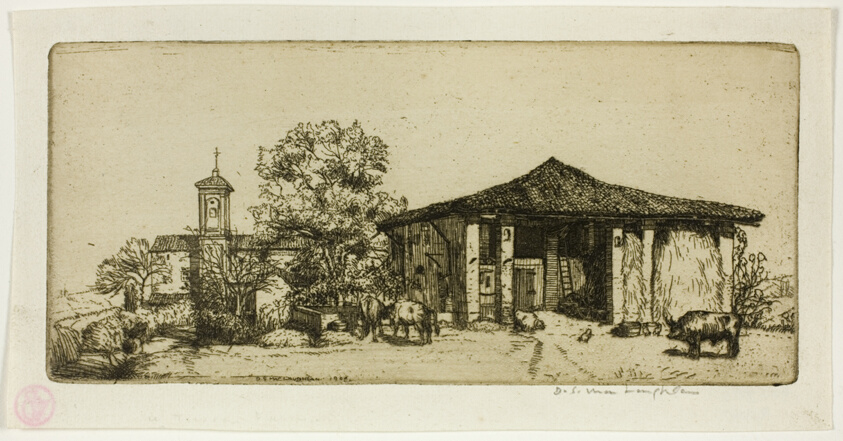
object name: Print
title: A Tuscan Farm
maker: Donald Shaw MacLaughlan (American, born Canada, 1876-1938)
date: 1904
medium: Etching in black on cream wove paper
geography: United States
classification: etching; print; prints and drawing